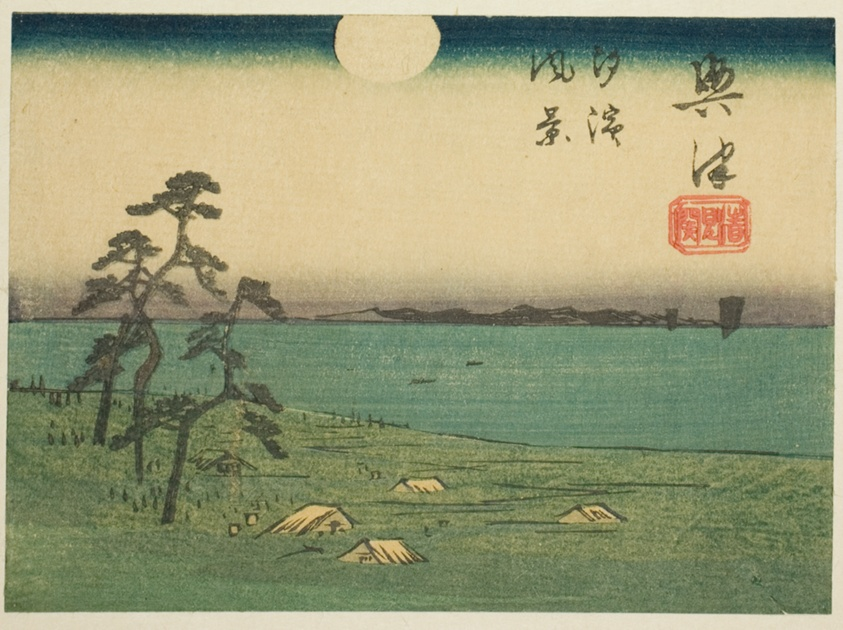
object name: Print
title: View of Shiohama and Kiyomigaseki in Okitsu (Okitsu, Kiyomigaseki, Shiohama fukei), section of sheet no. 4 from the series "Cutout Pictures of the Tokaido Road (Tokaido harimaze zue)"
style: Japanese (culture or style)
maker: Utagawa Hiroshige 歌川 広重; Japanese, 1797-1858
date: c. 1848/52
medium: Color woodblock print; section of harimaze sheet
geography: Japan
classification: woodblock print; print; asian art